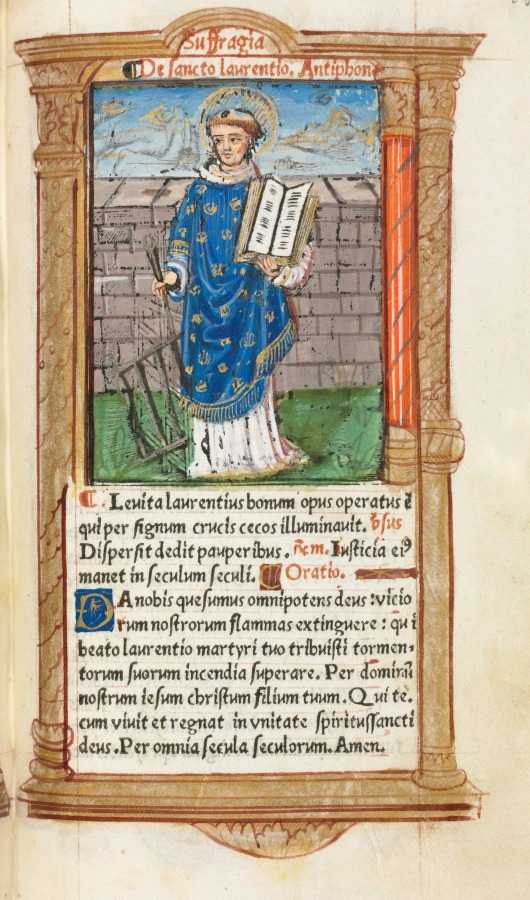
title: Printed Book of Hours (Use of Rome): fol. 101r, St. Lawrence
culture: France, Paris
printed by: Guillaume Le Rouge (French, Paris, active 1493–1517)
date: 1510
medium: 112 Printed folios on parchment, bound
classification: Bound Volume